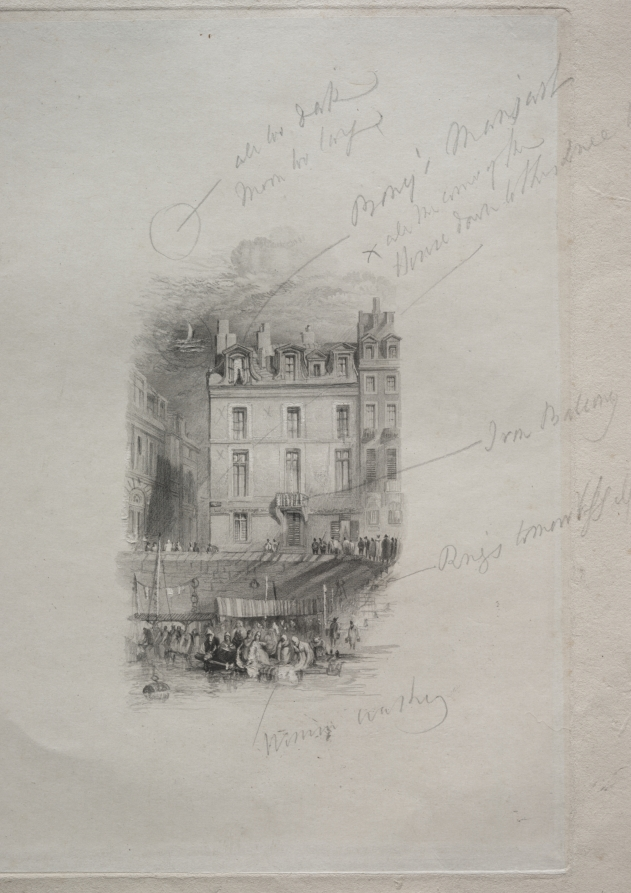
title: Napoleon's Logement, Quai Conti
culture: England, 19th century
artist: John Horsburgh (British, 1791–1869)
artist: after Joseph Mallord William Turner (British, 1775–1851)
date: 1836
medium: engraving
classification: Print